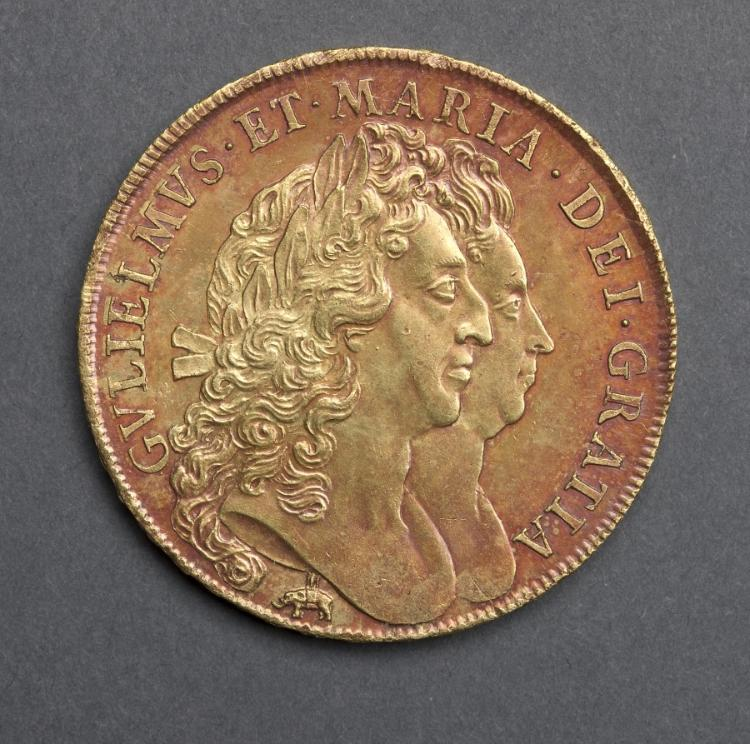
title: Five Guineas: William & Mary (obverse)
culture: England, William and Mary, 1688-1694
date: 1691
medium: gold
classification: Coins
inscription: GVLIELMVS . ET . MARIA . DEI . GRATIA.